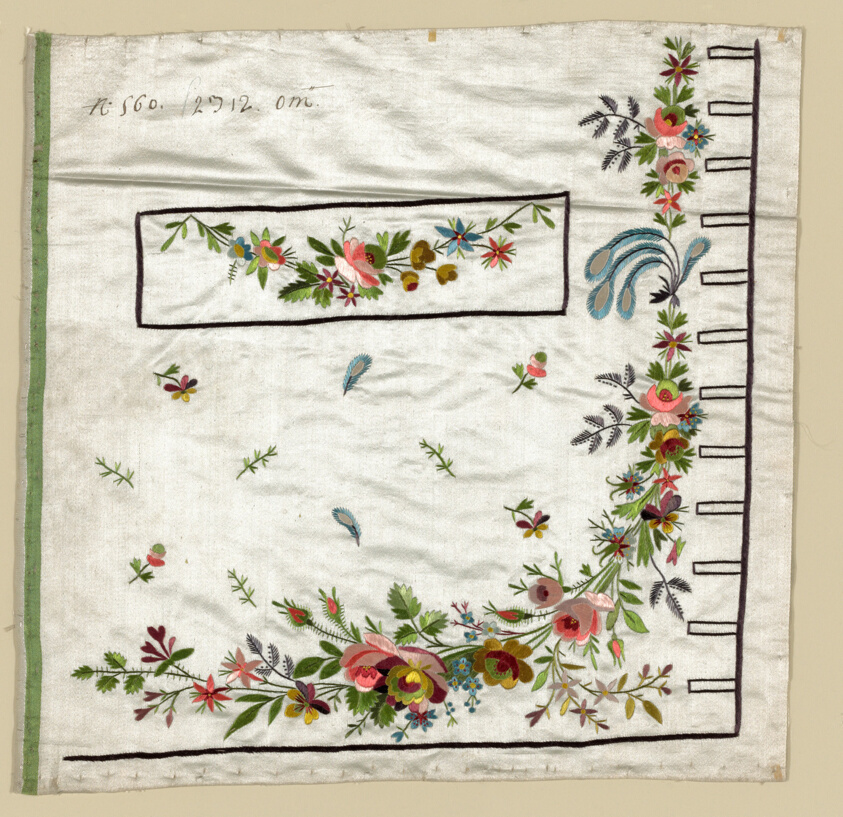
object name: Textile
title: Salesman's Sample (Waistcoat Pocket)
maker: Probably France, Lyon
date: 1780-1810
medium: Silk, warp-float faced satin weave; embroidered with silk floss in satin, single satin and stem stitches; French knots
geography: France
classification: textile; needlework (visual works); costume; costume - embroidery; embroidery; needlework - costume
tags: flowers, floral motifs, foliage, flora